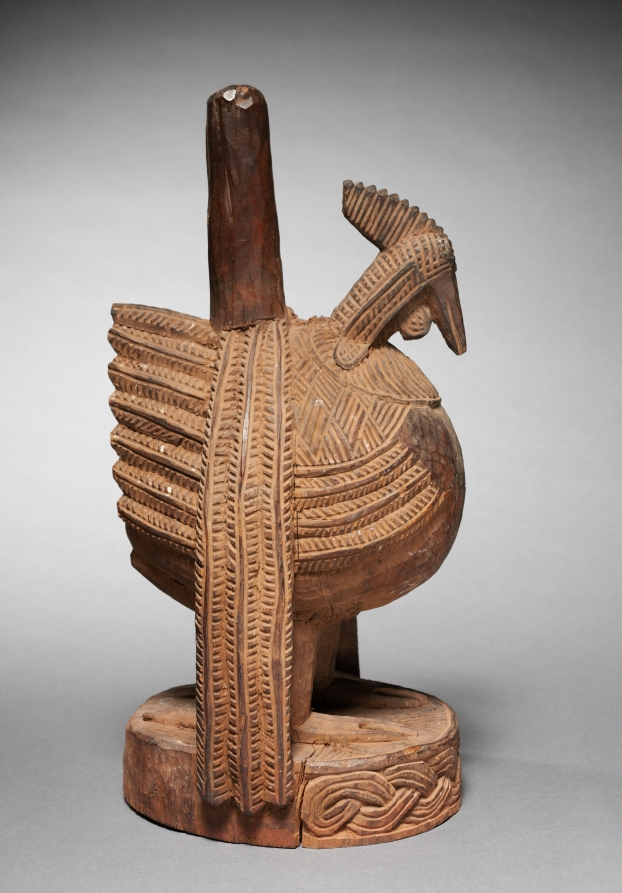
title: Hen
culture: Nigeria, Benin Kingdom, Ẹdo peoples, member(s) of the Igbesanmwan (wood and ivory carvers) guild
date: 1900s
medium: wood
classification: Sculpture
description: Materials used for ritual objects correspond with the status of their owner, or the person it was dedicated to. Men have cast brass roosters, while women have carved wooden hens like this. This egg-shaped bird is covered with patterns formed by parallel lines indicating the bird’s feathers, from fluffy tufts to sleek plumage. Realistically carved, it replicates an animal that would be sacrificed on a woman’s shrine. On an ancestral altar, it sat alongside other objects like rattle staffs. While Benin is patriarchal (men and their male sons lead), women are important; men cannot succeed spiritually or politically without them.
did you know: The interlacing pattern on the base of this sculpture can be seen in Benin Kingdom works in materials from wood to ivory to metal.